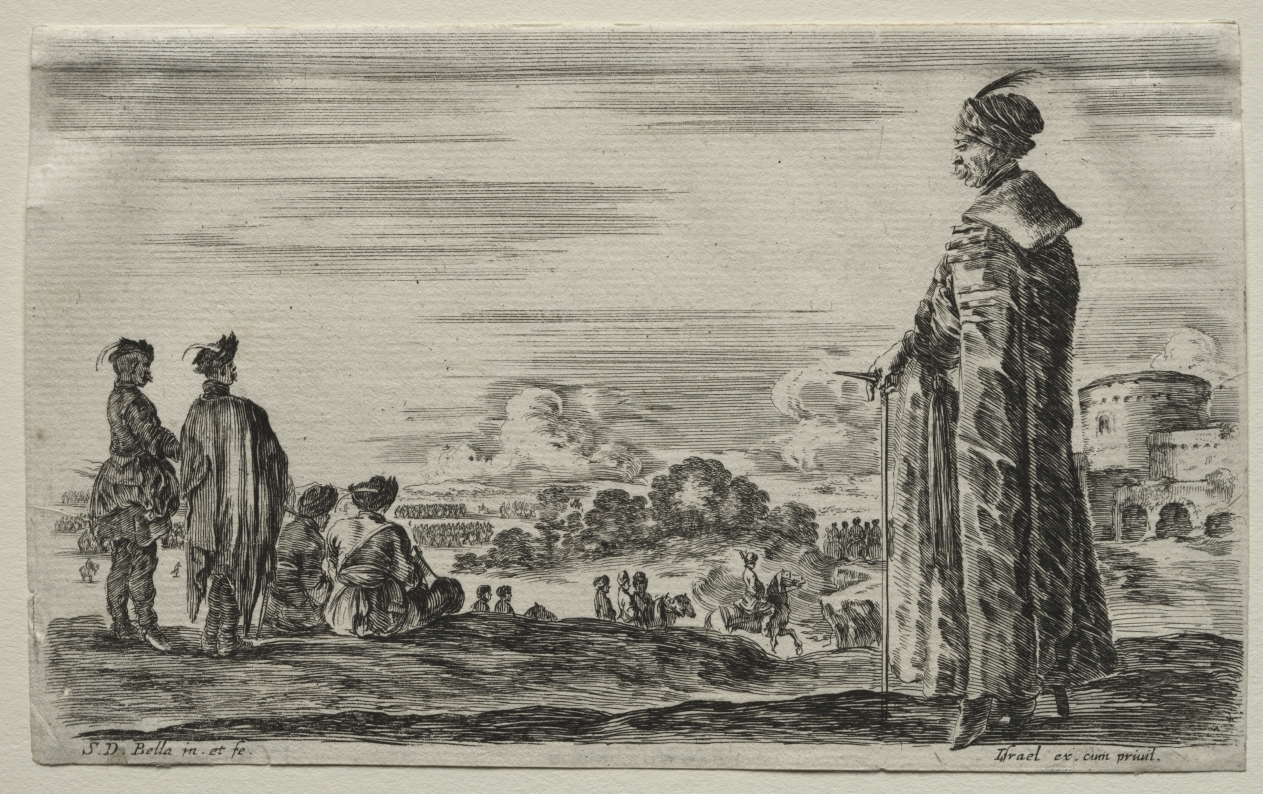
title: Various Figures and Landscapes: A Group of Polish Gentlemen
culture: Italy, 17th century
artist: Stefano Della Bella (Italian, 1610–1664)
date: 1649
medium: etching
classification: Print